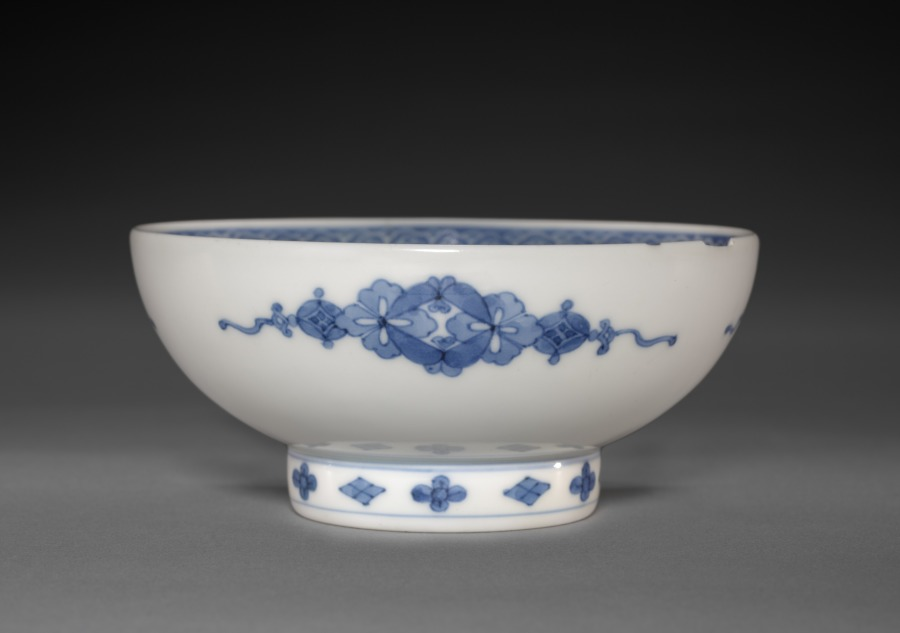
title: Dish with Hawk and Sparrows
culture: Japan, Meiji period (1868–1912) or Taishō period (1912–26)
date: c 1900– 1925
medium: Porcelain with underglaze blue decoration (Hizen ware)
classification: Ceramic